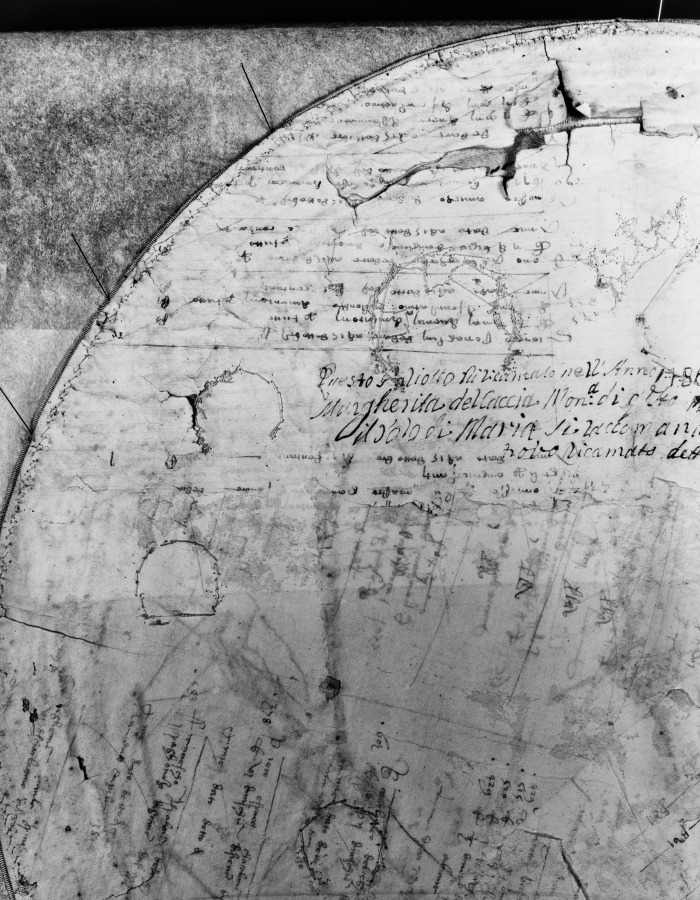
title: Embroidered Tondo from an Altar Frontal: The Coronation of the Virgin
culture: Italy, Florence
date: 1459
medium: Embroidery with gold, silver, and silk thread; split, satin, and couching stitches, or nué (shaded gold)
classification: Embroidery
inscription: the embroidery is backed by an old reused parchment with Latin writing over which in Italian is penned an inscription: "This pallioto was embroidered in the year 1486 by the venerable Margherita del Caccia nun of this monastery. . ." [It is difficult to know to what extent one should rely on this inscription as the style and technique both point clearly to an earlier date.]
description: This masterpiece of Florentine embroidery takes the circular form called a tondo and was likely once attached to an altar frontal. The scene depicts the coronation of the Virgin, the final and culminating event in the narrative cycle of her life. Honoring her as queen of heaven, Christ places the crown on his mother’s head. They are surrounded by eight angels as well as Saints Verdiana and John Gualberto, both much esteemed in Florence, creating a joyous scene. During the Renaissance, Florence emerged as an important center for a specific type of embroidery known as or nué, or shaded gold. This stunning technique used metal and silk threads, as seen here, to create pictures that rivaled paintings. It was frequently used for vestments and altar frontals.